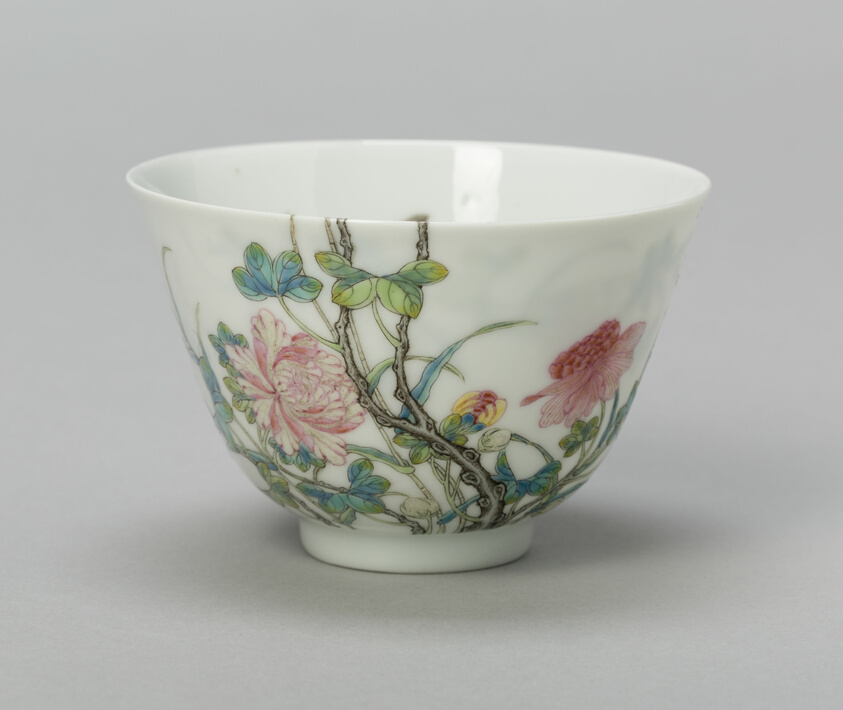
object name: Vessel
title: Teabowl with Mufurong (Hibiscus) and Dragonfly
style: Chinese (culture or style)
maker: China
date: Qing dynasty (1644–1911), Yongzheng reign mark and period (1723–1735)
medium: Porcelain painted with overglaze enamels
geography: China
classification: drinking vessel; porcelain; asian art; ceramics; vessel